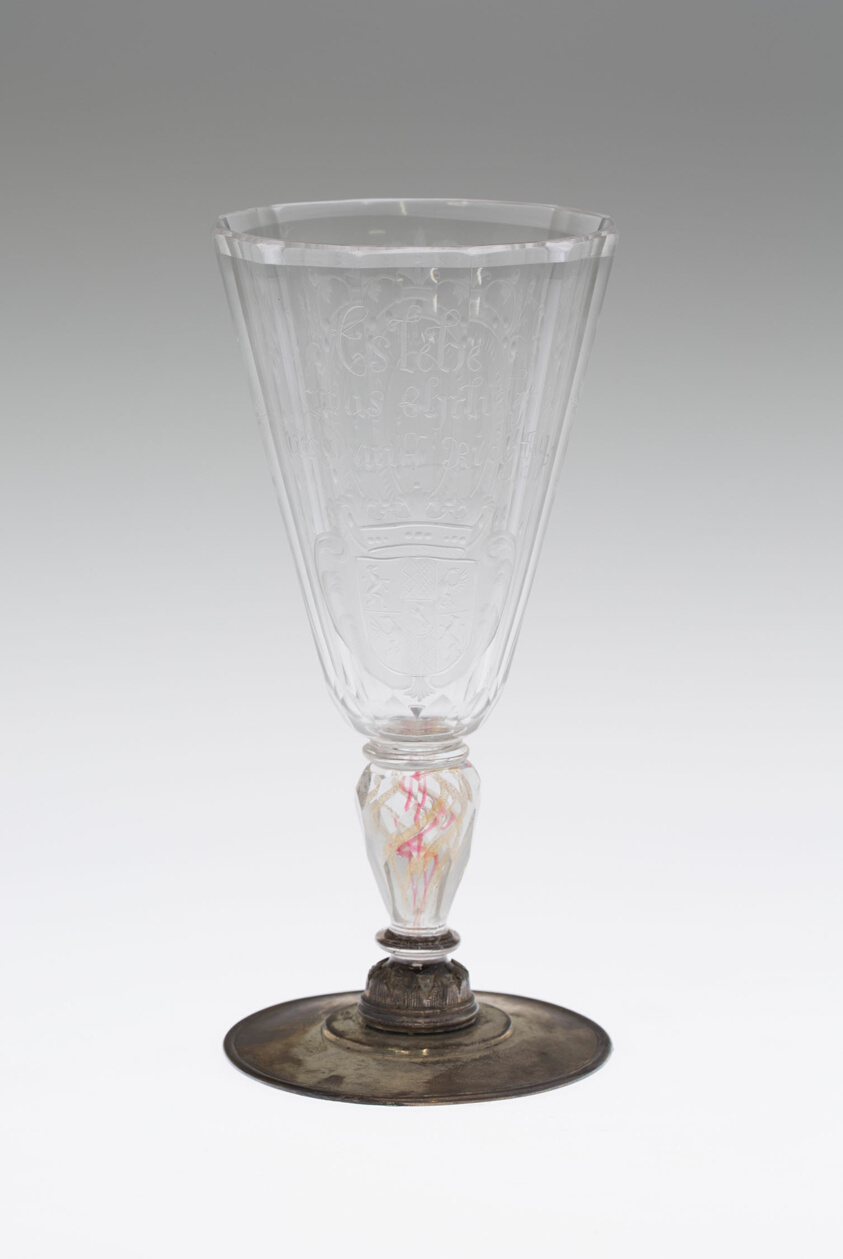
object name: Glass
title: Goblet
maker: Germany, Schleswig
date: 1700/25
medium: Glass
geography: Schleswig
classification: drinking vessel; glass; european decorative arts